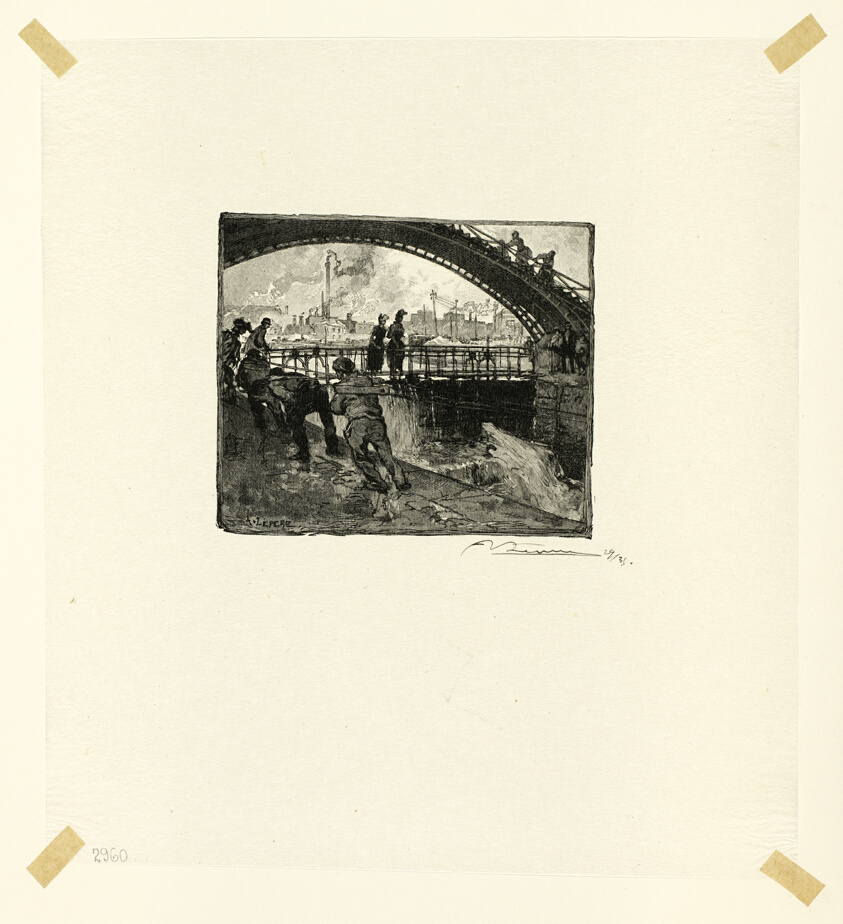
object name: Print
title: Lock of the Canal Saint-Martin, plate six from Le Long de la Seine et des Boulevards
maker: Louis Auguste Lepère (French, 1849-1918); published by A. Desmoulins (French, active c. 1908-1910)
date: 1890, published 1910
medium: Wood engraving in black on cream Japanese tissue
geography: France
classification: wood engraving; print; prints and drawing